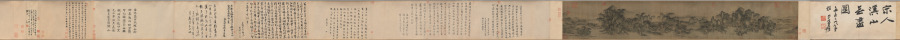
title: Streams and Mountains without End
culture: China, late Northern Song dynasty (960-1127) - Jin dynasty (1115-1234)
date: 1100–1150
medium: handscroll; ink and slight color on silk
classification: Painting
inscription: 9 colophons and 48 seals: 1 colophon, dated 1205, of Wang Wenwei 王文蔚 (dates unknown); 1 colophon, dated 1205, of Li Hui 李惠 (dates unknown); 1 colophon of Weiluo Tian Xie 蔚羅田獬 (dates unknown); 1 colophon, dated 1214, of He Yan 何言 (dates unknown); 1 colophon, dated 1326, of Cao Yuanyong 曹元用 (d. 1329) 1 colophon, dated 1332, of Kangli Zishan 康里子山 (Naonao; 1295-1345); 1 colophon, dated 1336, of Liu Zai 劉載. (dates unknown); 1 colophon, dated 1380, and 4 seals of Yang Mao 楊懋 (1300-after 1380); 4 seals of the Hou family (ca. 1340); 1 colophon of Wang Duo 王鐸 (1592-1652); 4 seals of Zhang Bingqian 張秉乾 (juren of 1729); 8 seals of Liang Qingbiao 梁清標 (1620-1691); 2 seals of the Qianlong emperor (r. 1736-95); 4 seals of the Jiaqing emperor (r. 1796-1820); 3 seals of the Xuantong emperor (r. 1909-11); 2 seals of Ye Gongchuo 葉恭綽 (1881-1968); 17 seals of Zhang Yuan 張爰 (Zhang Daqian 張大千, 1899-1983).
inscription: Colophon 1. Wang Wenwei 王文蔚. Dated third month and third day, 1205, under the reign of Zhangzong of the Jin dynasty. 造物元無心，山川秀氣聚。畫手亦無盡，各出新意度。 誰將妙林泉，淡墨寫縑素。重巒疊嶂間，三兩人家住。 茅舍隔素籬，小橋通細路。溪上數葉舟，雅有物外趣。 嵓崦藏招提，依稀認窗戶。山色四時宜，雲煙自朝暮。 不知塵世中，此景在何處。收拾買山錢，投老好歸去。 泰和乙丑三月三日平原王文蔚謹再拜，書于河東縣署之野趣堂。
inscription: Colophon 2. Li Hui 李惠. The colophon was written three days before the Qingming Festival in 1205. 畫師慣在山中居，含毫吮墨聊自娛。 閑將一段冰霜絹，寫出千里江山圖。 前山後山互出沒，山腰林樾相縈紆。 危橋澗溜瀉鳴玉，山根一匯為平湖。 波平短艇快漁釣，雲深細徑來樵蘇。 僊宮梵宇占幽勝，雕欄複閣森蓬壺。 往來行客煙靄外，飄飄野店青帘孤。 人家雞犬聲相接，熙熙化日安唐宇。 嗟余嗜好何其迂，膏肓泉石真吾徒。 一行作吏墮世網，薄書汨沒勞奔趨。 千巖萬壑但夢想，故園三徑應將蕪。 披圖暫洗黃塵眼，拊膺三嘆空踟躕。 泰和乙丑清明前三日絳臺李惠書于舜城府署之九思堂。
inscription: Colophon 3. Weiluo Tian Xie 蔚羅田獬. 畫工紛紛不可紀，擺脫俗流幾人耳。 夫誰援筆掃鵝溪，一段風煙且千里。 白波青嶂渺無窮，水接山兮山插水。 小橋野店相勾連，古寺樓臺突兀起。 飄然氣象與神俱，但患未明孰姓氏。 郭熙雖老典型存，為問主公無乃是。 此畫世希當寶藏，無與碌碌同一視。 更看卷首數公詩，奇絕清新相表裏。 蔚羅田獬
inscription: Colophon 4. He Yan 何言. Written in 1214. 萬有來自無，一真歸所託。畫師得三昧，胸中幻丘壑。 百態逐墨破，群形隨筆落。地近迹分明，天遙痕隱約。 雲物自吐吞，峯巒非斧鑿。江鄉閴無市，谷關常不鑰。 中有野夫閑，童琴而歩鶴。酒斾出籬懸，漁舟臨岸泊。 澗樹蔽橋樑，巖松迷殿閣。岑疊宿霧重，野曠林煙薄。 危棧接縈紆，亂泉通脈絡。途中人往來，僕馬何羸弱。 怪石虎踡跼，古木龍蟠錯。一幅宜好收，千金非易博。 玉堂閑卷舒，眼界增寥廓。視險尚寛平，見危除慘虐。 氣象溢國華，川澤資廟略。功名業已書，歸去鞭先著。 但知色即空，何是今非昨。飽乎仁智心，箇中無限樂。 貞祐甲戌秋暮，東營何言題。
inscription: Colophon 5. Cao Yuanyong 曹元用 (d. 1329). Dated 1326. 岸擁危橋斷，溪浮小艇斜。 萬山最深處，依約兩三家。 泰定丙寅秋，曹元用題。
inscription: Colophon 6. Kangli Zishan 康里子山 (i.e., Kangli Naonao). The colophon bears a date of 1332. 右溪山圖，意韻蕭灑。一見使人有烟霞之想，真可珍藏。又有□金諸名勝題詩其左。兵火之餘， 殊不易得也。 至順三年暮春之月，康里子山跋。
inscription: Colophon 7. Liu Zai 劉載. 雲拂埜田閑種玉，雨餘巖溜碎傾金。 幾時也結團茆去，麟閤恬然不挂心。 至元二年正月，長安劉載載之謹錄上。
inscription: Colophon 8. Yang Mao 楊懋 (1300–after 1380). 觀此圖，經營位置，筆法高古，山明石潤。其橋梁、路道、樹林、人物、遠近；一一誠得真山水之深趣。非當時名筆有大才者不能至此。不必問其誰何，可為神品。况宋金元三朝名公所跋，尚不能記，想其來尤遠矣。然而物經累變而尚存，是物之有壽者也。余不復再論。文顯其保之。洪武庚申春，八十翁楊懋觀。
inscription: Colophon 9. Wang Duo 王鐸 (1592–1652). 文蓀親翁博雅，文詩鴻暢。舍弟持此喜觀，遂抽管題數語： 山勢委折，筆墨無痕。宋人中如此不多見也。譬之兵家，當是韓白。王鐸。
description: Streams and Mountains without End was a landmark acquisition of 1953, made just a year after Sherman Lee had returned to Cleveland as curator of Oriental art. He acquired it with the intention to provide "a more than adequate foundation for a fine collection of Chinese landscape painting." This impressive work demonstrates the culmination of stylistic developments in Chinese monumental landscape painting following the Northern Song tradition. It represents a journey through a landscape, making it a fitting metaphor for Lee’s journey of discovery and achievement over a lifetime.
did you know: The portrayal of the distant lands is rich with details like pavilions, villages, and human activities.